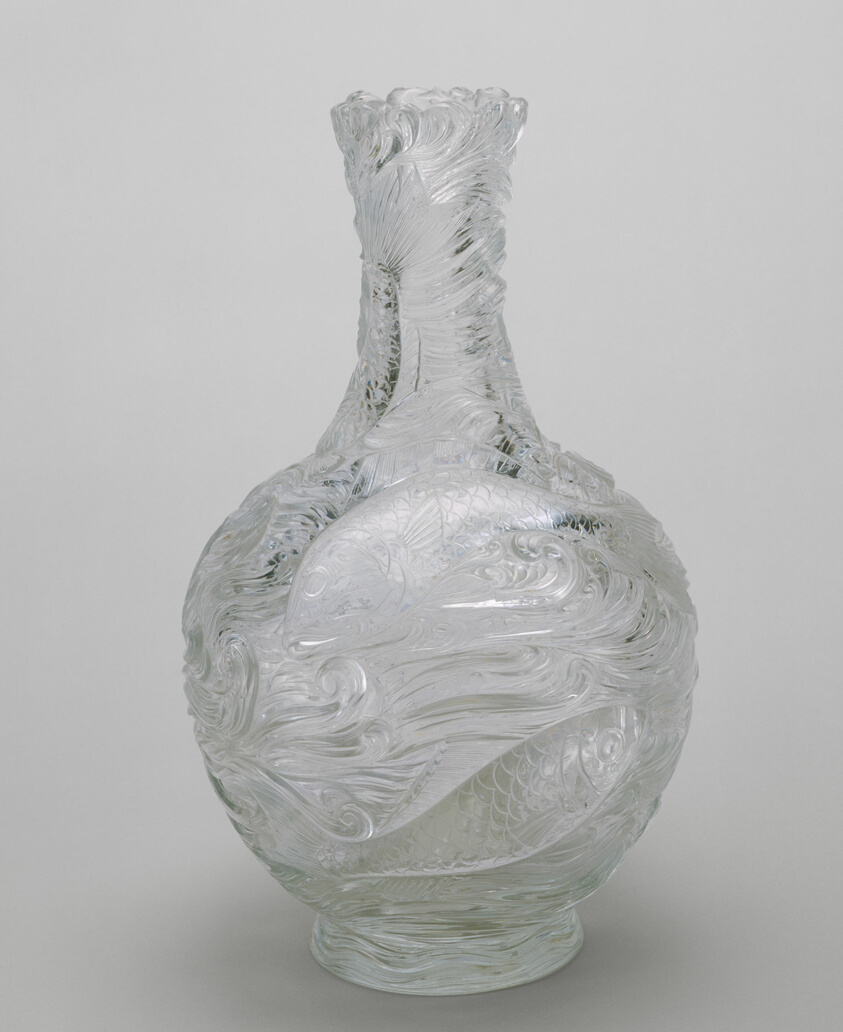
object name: Glass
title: "Rock Crystal" Vase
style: design reform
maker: Thomas Webb & Sons (Stourbridge, England, founded 1837)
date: 1889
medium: Glass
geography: Stourbridge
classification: vase; vessel; glass; european decorative arts